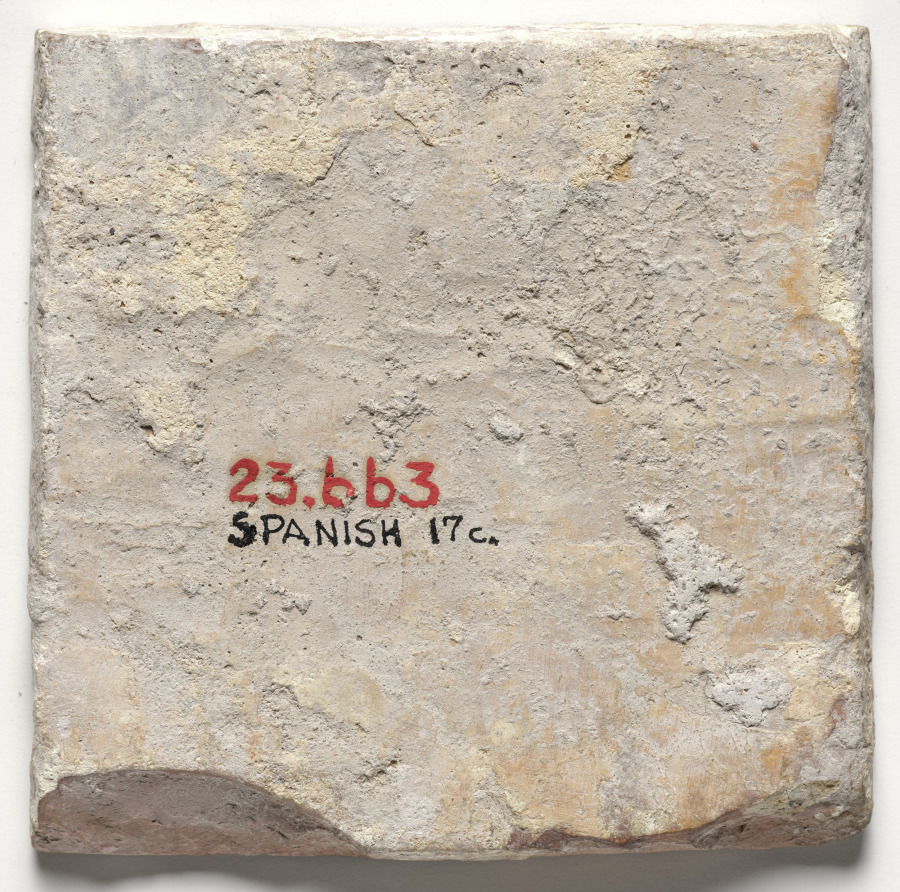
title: Wall Tile–Man with a Sword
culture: Spain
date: c. 1600s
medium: glazed ceramic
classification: Ceramic